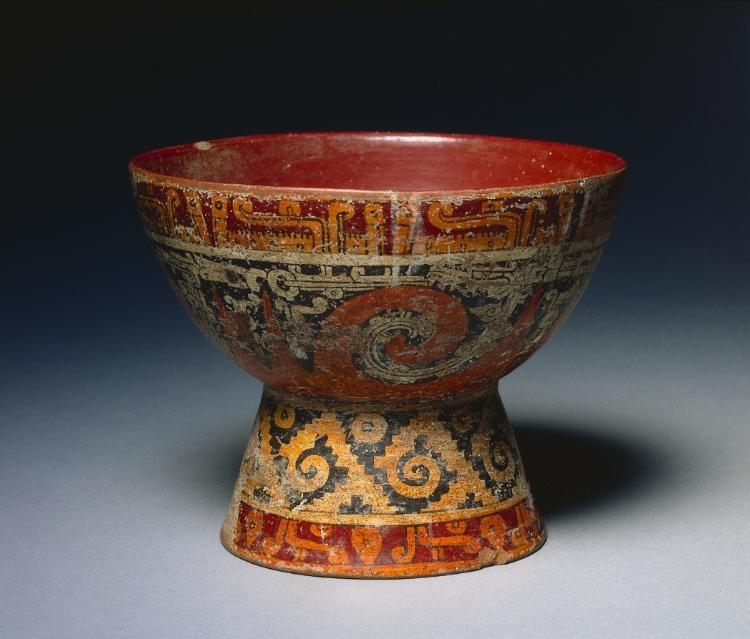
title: Pedestal Bowl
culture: Mexico, Cholula?, Mixteca-Puebla Style, 10th-16th century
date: c. 900–1519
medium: earthenware with colored slips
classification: Ceramic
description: The nobility may have used these goblets for a chocolate beverage or for pulque, made from the fermented sap of the maguey cactus. Both are painted with the precision and brilliant colors for which the Mixteca-Puebla style is renowned, and they carry some of the same motifs, such as the band of stylized animal heads at the top. The smaller bowl has a rattle base.